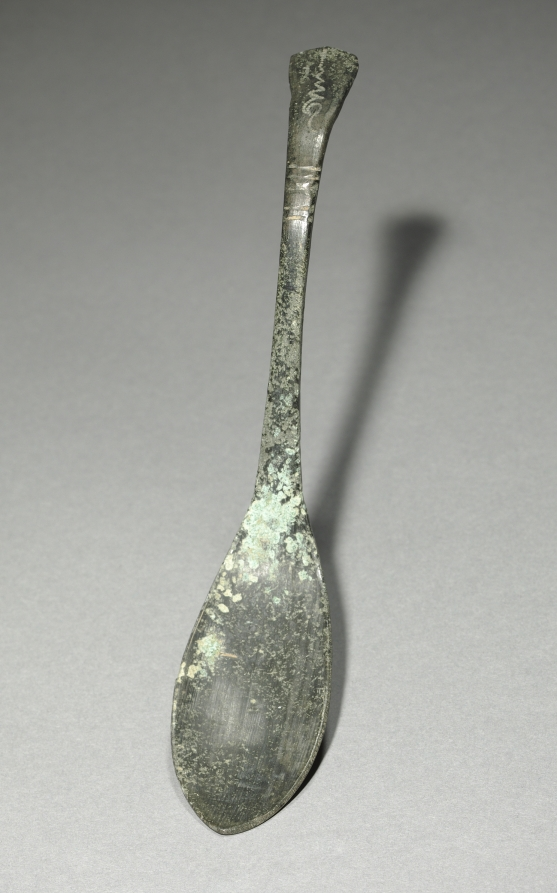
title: Spoon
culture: Korea, Goryeo dynasty (918–1392)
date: 918–1392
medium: bronze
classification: Metalwork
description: Celadons, spoons, seals, and bronze mirrors were the most common burial objects in tombs during the Goryeo period (918–1392). Furnishing tombs with an elaborate assemblage of objects was believed to honor and comfort the newly dead. Generally, Goryeo tombs were left untouched until the late 19th century. During the colonial period (1910–45), however, Japanese archaeologists hastily excavated the tombs located in Kaeseong, the former capital of the Goryeo period. Scholars recently have proposed that toward the end of the 14th century, Koreans enjoyed meat-based soups more than any other dishes, explaining why many more spoons than chopsticks were buried in tombs.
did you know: Bronze spoons are the most common burial item. Scholars have proposed that toward the end of the 1300s, Koreans enjoyed meat-based soups more than any other dishes, explaining why spoons became common household items as well as burial goods.